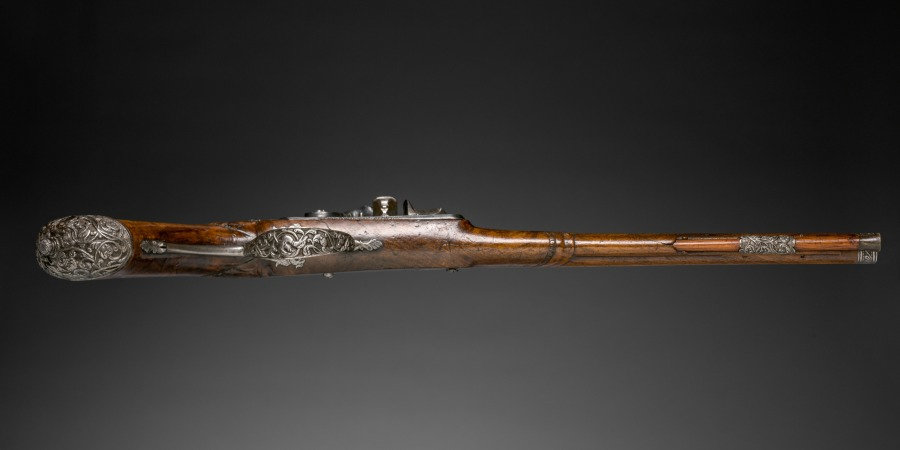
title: Flintlock Pistol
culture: Italy, Brescia, late 17th century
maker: Gio Borgognone (Italian)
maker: Lazarino Cominazzo (Italian)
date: c. 1690–1700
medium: steel, chiseled steel with walnut stock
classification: Arms and Armor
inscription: barrel signed: Lazarino Cominazzo; lockplates signed: Gio Borgognone in Bresia